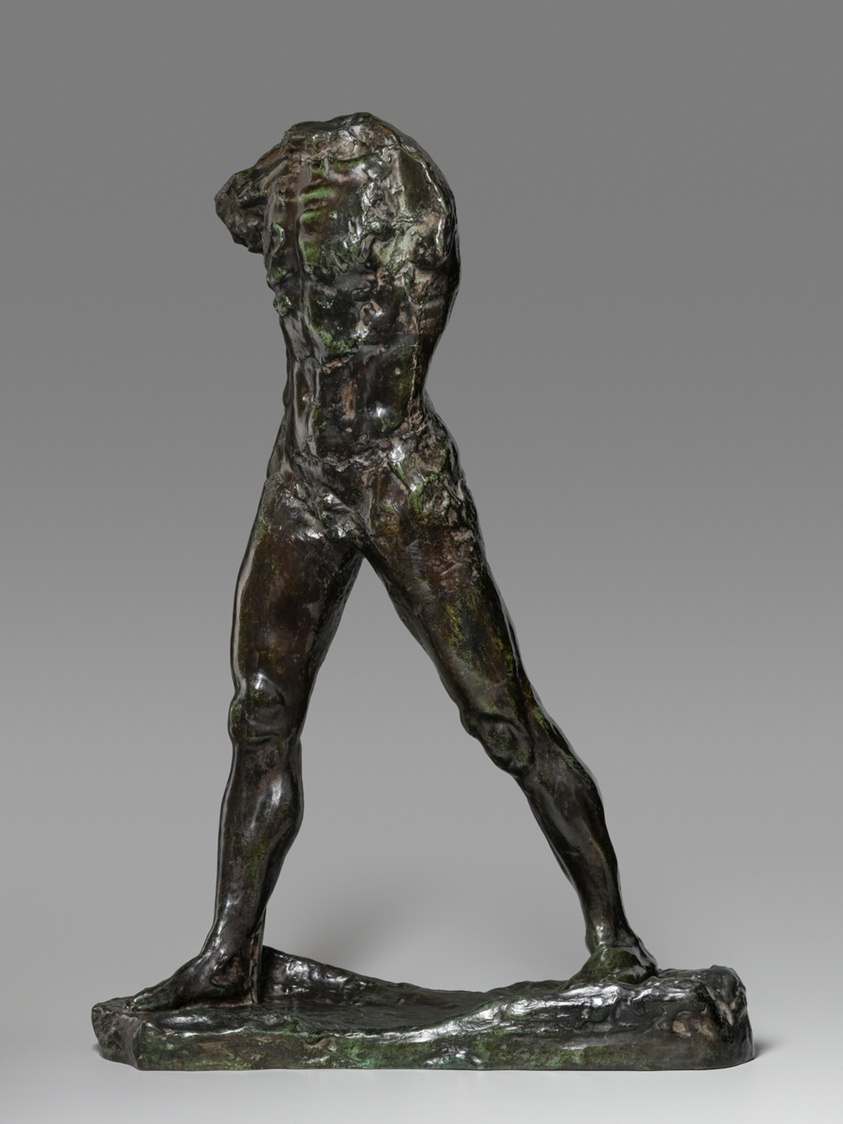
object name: Sculpture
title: The Walking Man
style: Post-Impressionism, 19th century, 20th Century, nineteenth century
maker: Auguste Rodin (French, 1840–1917)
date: Modeled 1877–1900, cast before 1917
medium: Bronze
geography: France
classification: statuette; sculpture; figure; french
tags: men, portraits, figure, man, nudes, walking